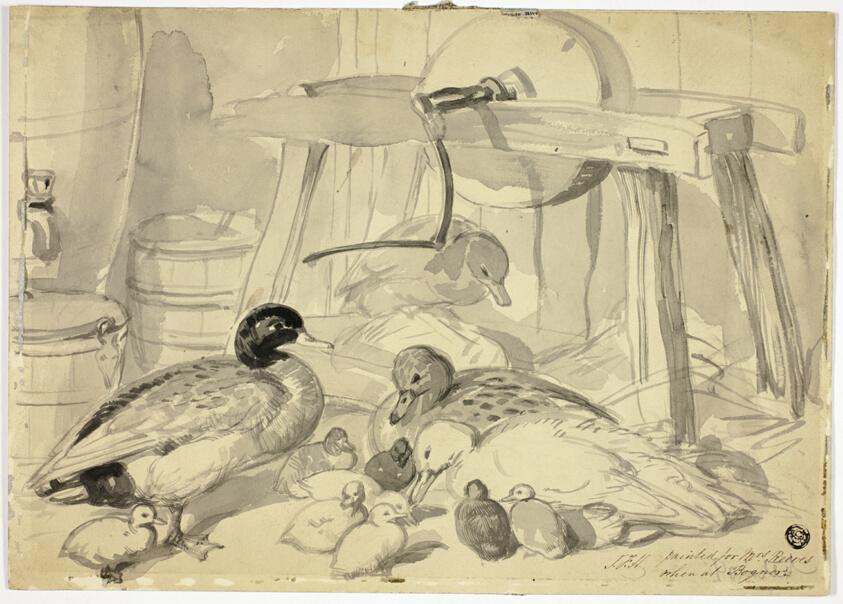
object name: Drawing and Watercolor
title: Ducks, Ducklings and Grindstone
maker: John Frederick Herring, I (English, 1795-1865)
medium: Brush and black wash, over graphite, on cream wove card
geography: England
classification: ink or chalk wash; brush and wash; drawings (visual works); prints and drawing; paper